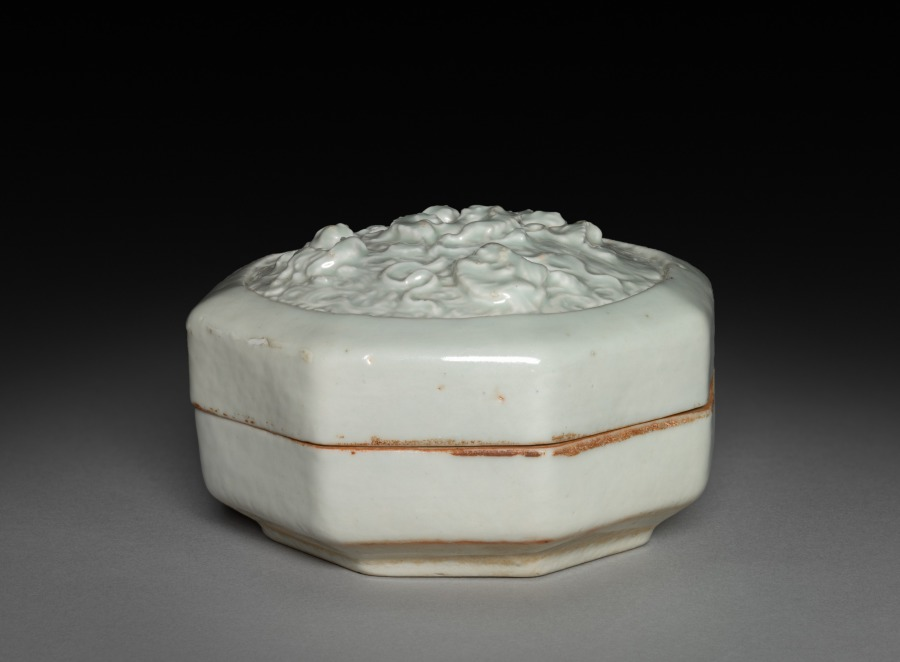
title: Hexagonal Covered Box with Lions in Relief: Qingbai Ware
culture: China, Jiangxi province, Jingdezhen kilns, Yuan dynasty (1271-1368)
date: 1300–1325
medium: glazed porcelain with molded and applied decoration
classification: Ceramic